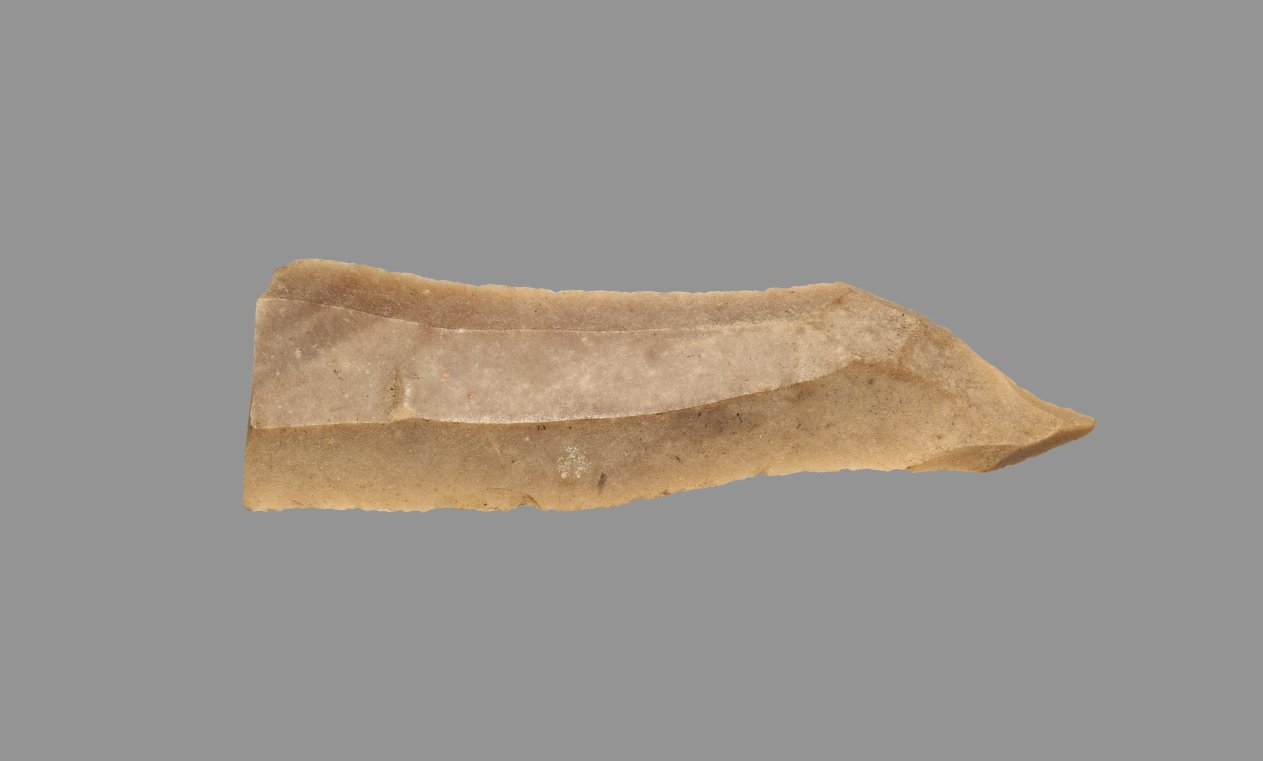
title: Sickle Blade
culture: Egypt, Middle Kingdom (2040–1648 BCE), Dynasty 12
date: 1980–1801 BCE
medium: flint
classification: Implements